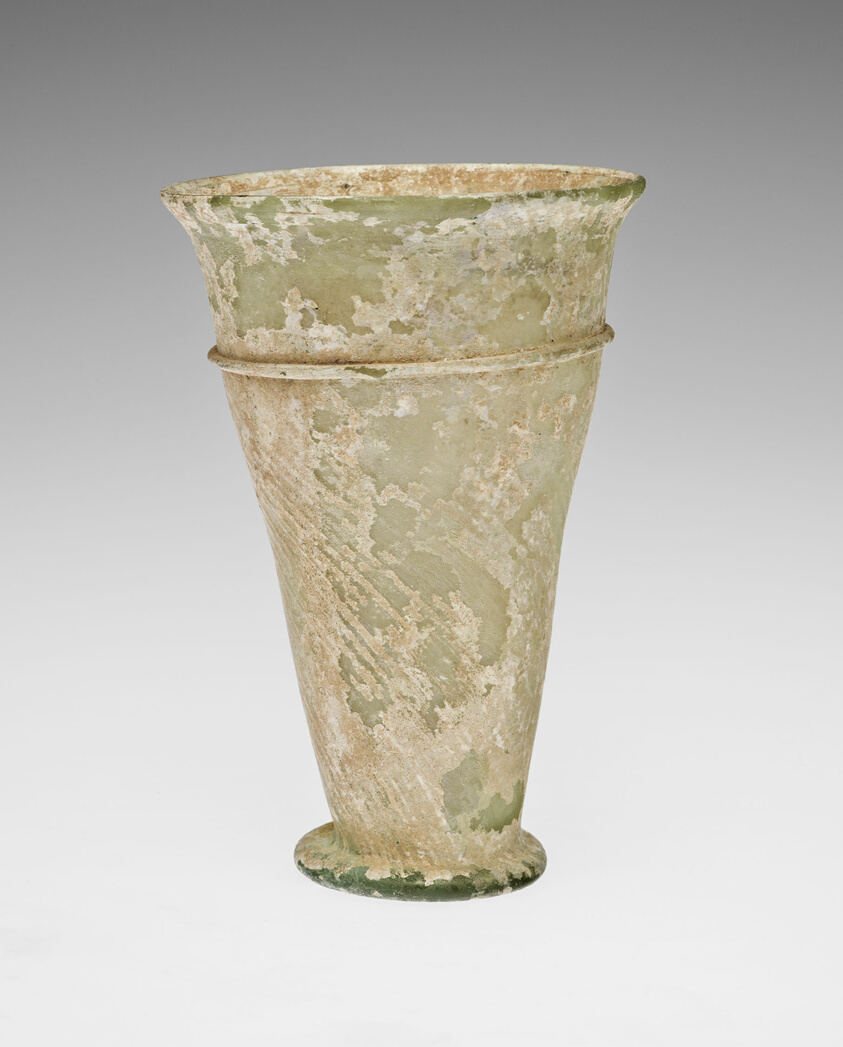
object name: Vessel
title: Beaker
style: syrian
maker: Roman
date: 3rd-4th century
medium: Glass, mold-blown technique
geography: Syria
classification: drinking vessel; glass; vessel; ancient art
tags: drinking, containers